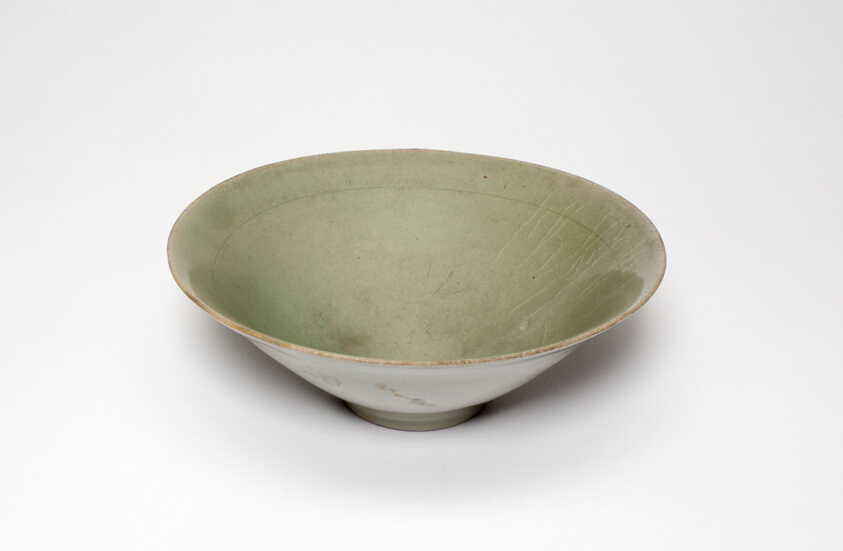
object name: Decorative Arts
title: Bowl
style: Korean (culture or style)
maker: Korea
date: Goryeo dynasty (918–1392), 12th century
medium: Stoneware with celadon glaze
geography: Korea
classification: bowl; dish (vessel); asian art; ceramics; decorative arts